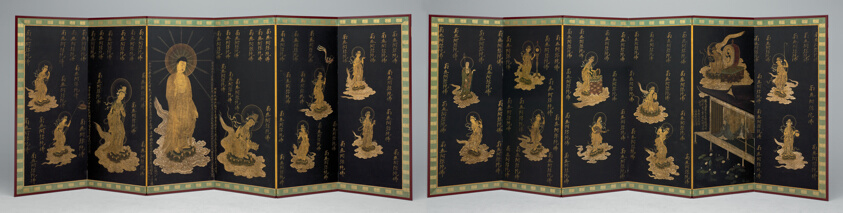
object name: Painting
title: Rebirth of the Nun Anyo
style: Japanese (culture or style)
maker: Artist Unknown; Japanese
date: early 18th century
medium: Pair six-panel screens; ink, colors, and gold on paper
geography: Japan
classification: painting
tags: Buddhism, religion